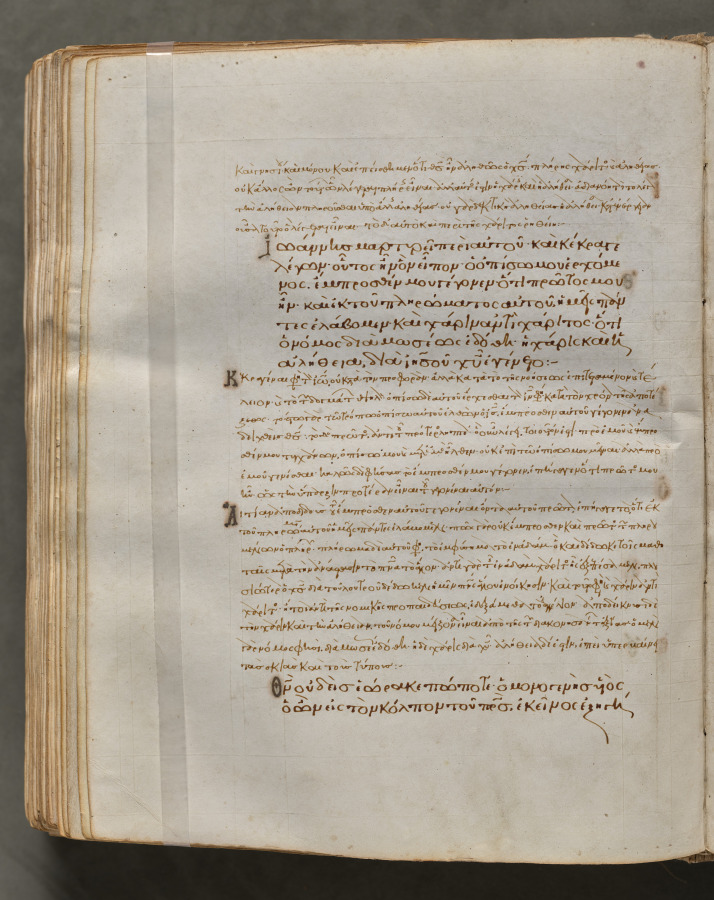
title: Text, folio 325 (verso), from a Gospel Book with Commentaries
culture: Byzantium, Constantinople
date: c. 1000–1100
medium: ink, tempera, and gold on vellum; leather binding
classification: Bound Volume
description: Each of the four gospels in this book opens on a page with brilliantly illuminated borders depicting the author of the text as well as birds—principally peacocks, symbols of the immortality of the soul—and fountains, representing the fountain of life and the salvation of the soul. This volume consists of 428 leaves with texts in Greek. Its level of sophistication suggests that it was probably written and decorated in a monastery in Constantinople.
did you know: Gospel books were carried in procession through Byzantine churches.